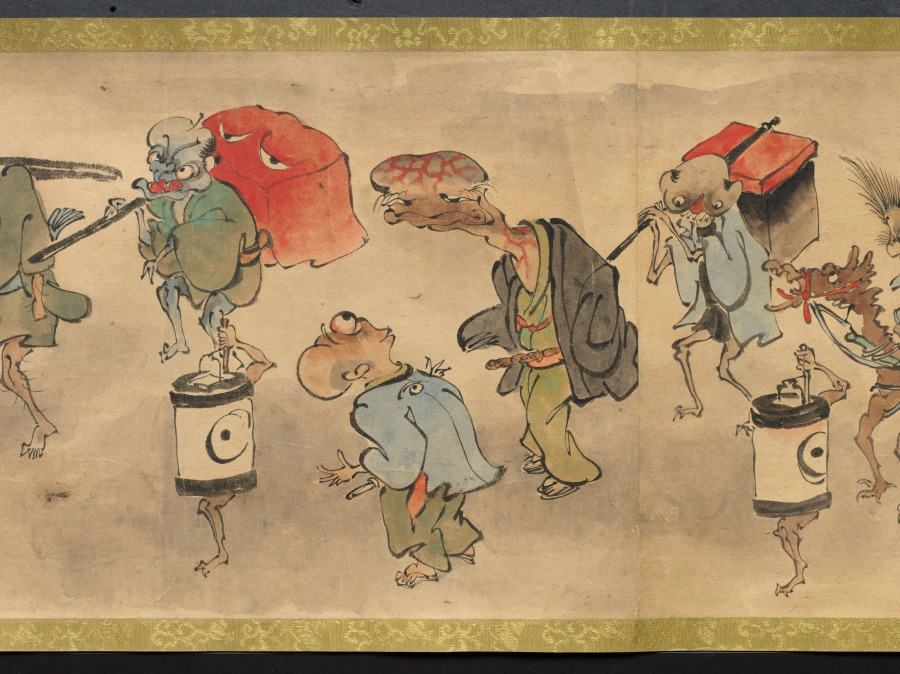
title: An Illustrated Marriage of Apparitions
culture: Japan, Edo period (1615–1868)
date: mid-1800s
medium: handscroll; ink and color on paper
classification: Painting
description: The matchmaking, engagement, wedding, and birth of the first child of two apparitions, or bakemono, literally "things that change," are illustrated in this whimsical, humorous handscroll. Japanese folklore abounds with such strange creatures, most famously represented in handscrolls featuring a procession of 100 supernatural monsters. Aside from a textual preface and cartouches indicating the content of the scenes, the tale is told visually. The artist and whereabouts of the original handscroll are unknown, but a number of other 19th-century copies by amateur painters exist in Japanese collections, attesting to its broad appeal.